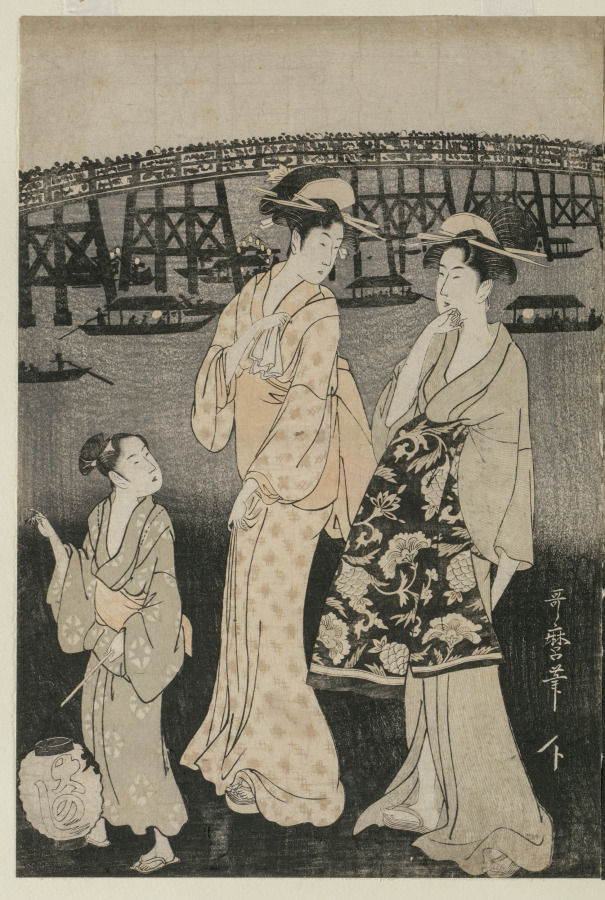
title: Women Enjoying the Evening Cool Near Ryogoku Bridge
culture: Japan, Edo period (1615–1868)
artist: Kitagawa Utamaro (Japanese, c. 1754–1806)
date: c. mid 1790s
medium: color woodblock print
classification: Print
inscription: Artist's signature: Utamaro hitsu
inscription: Publisher: Yamguachiya Chūsuke (emblem)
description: People crowding the Ryōgoku Bridge over the Sumida River and those aboard party boats below enjoy summer fireworks. Among a group gathered on the riverbank a little boy stands holding his caged pet cricket in one hand, and a young woman’s hand in the other. At left, a boy with a lantern advertising the name of the restaurant for which he works, “Ōnoshi,” guides two women away.